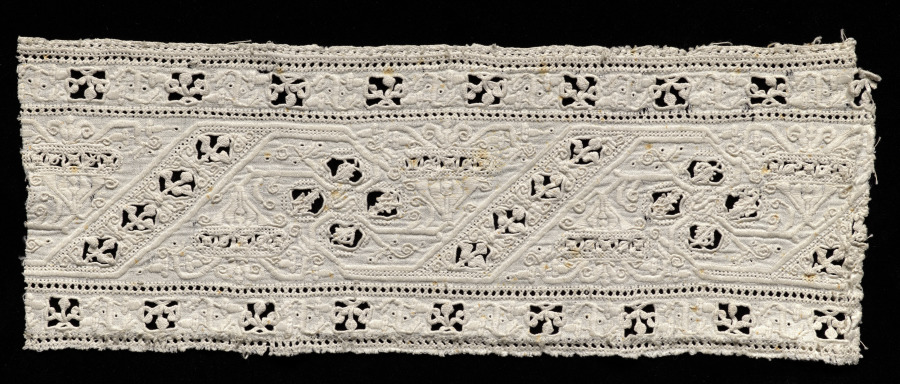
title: Lace fragment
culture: Italy, Venice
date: 1500s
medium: Linen: needle lace (cutwork) insertion with embroidery; satin stitch (punto reale)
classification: Lace